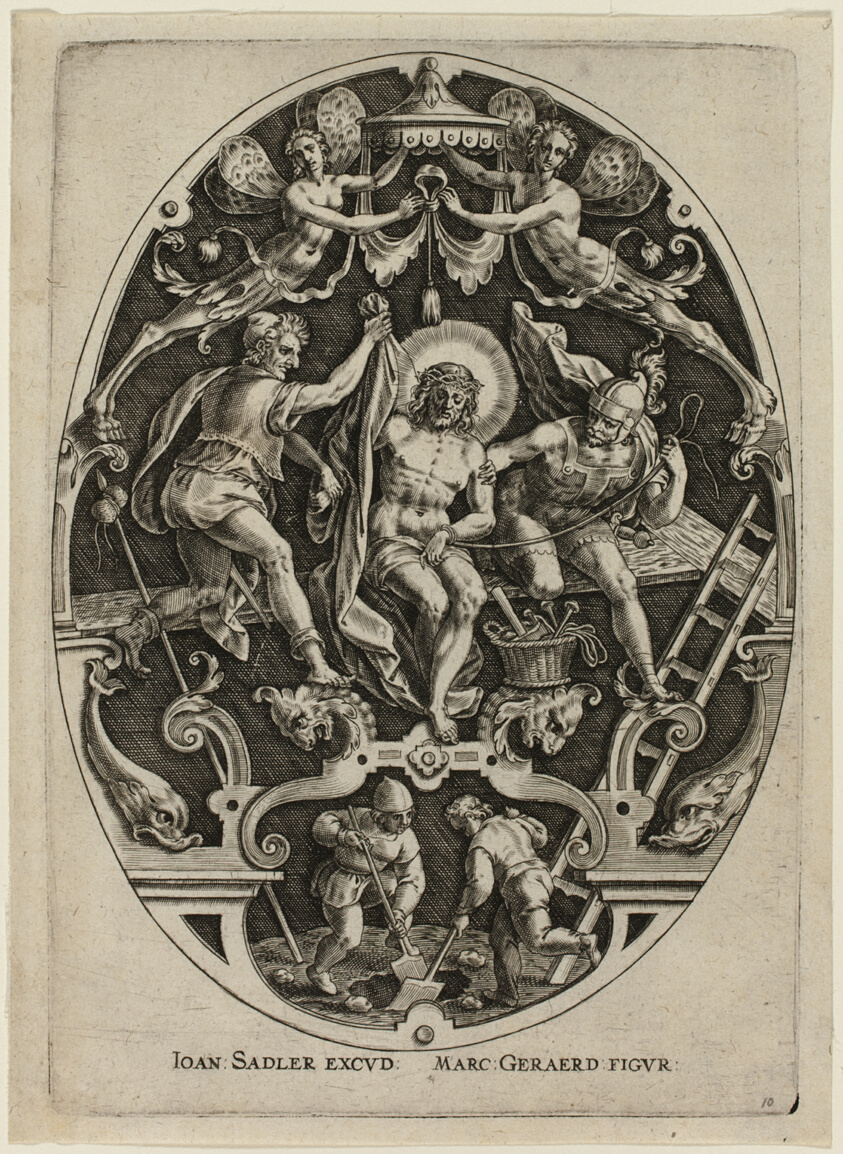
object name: Print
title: Christ Disrobed by the Soldiers, from Passion of Christ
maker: Jan Sadeler, the Elder (Flemish, 1550-1600); after Marcus Gheeraerts, the Elder (Flemish, c. 1520-c. 1590)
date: 1575/1600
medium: Engraving in black on ivory laid paper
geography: Flanders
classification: engraving; print; prints and drawing